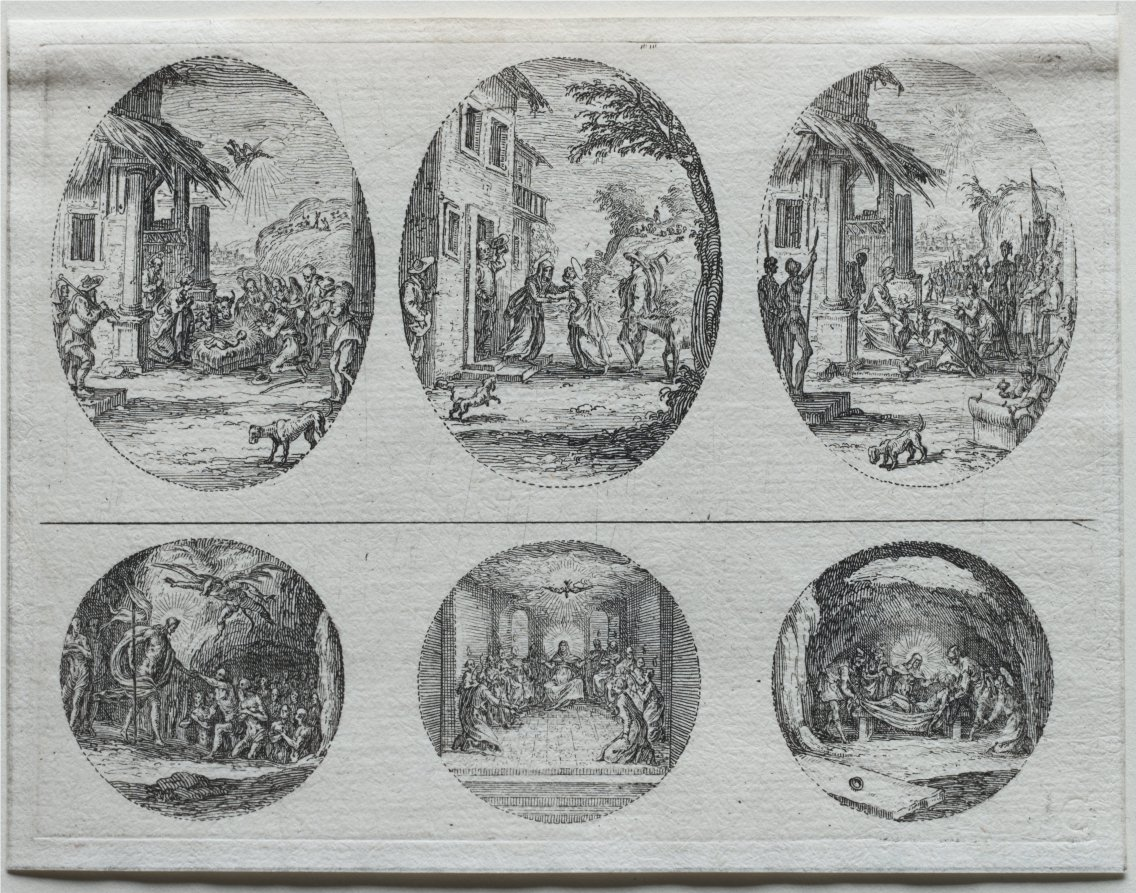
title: The Mysteries of the Passion: The Entombment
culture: France, 17th century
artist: Jacques Callot (French, 1592–1635)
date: 1631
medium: etching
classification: Print